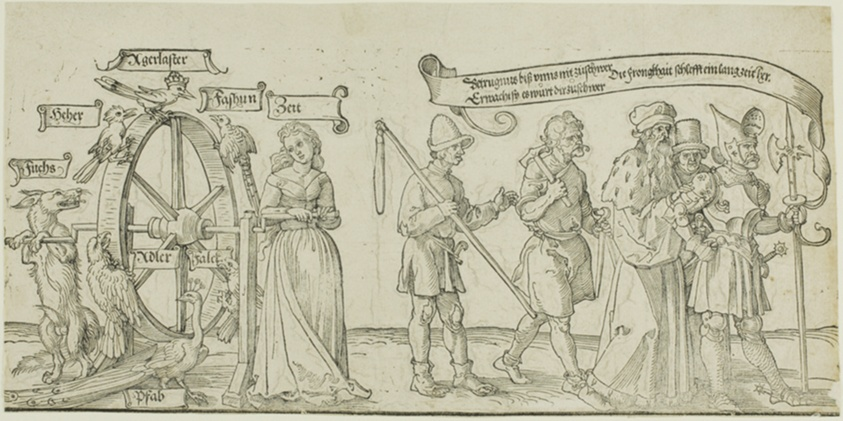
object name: Print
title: The Michelfeldt Tapestry (Allegory on Social Injustice), first part of three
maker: Attributed to Albrecht Dürer; German, 1471-1528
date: 1526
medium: Woodcut in black on cream laid paper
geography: Germany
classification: woodcut; print; prints and drawing; paper